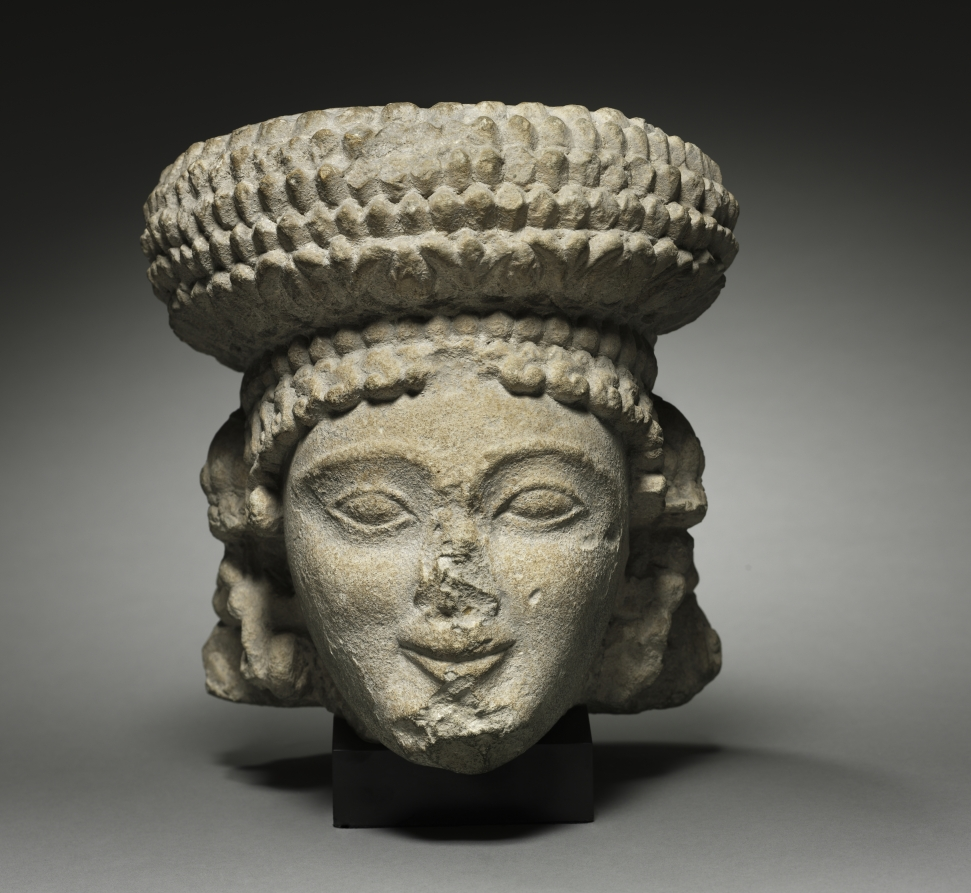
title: Head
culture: Cyprus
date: 500–300 BCE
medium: limestone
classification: Sculpture